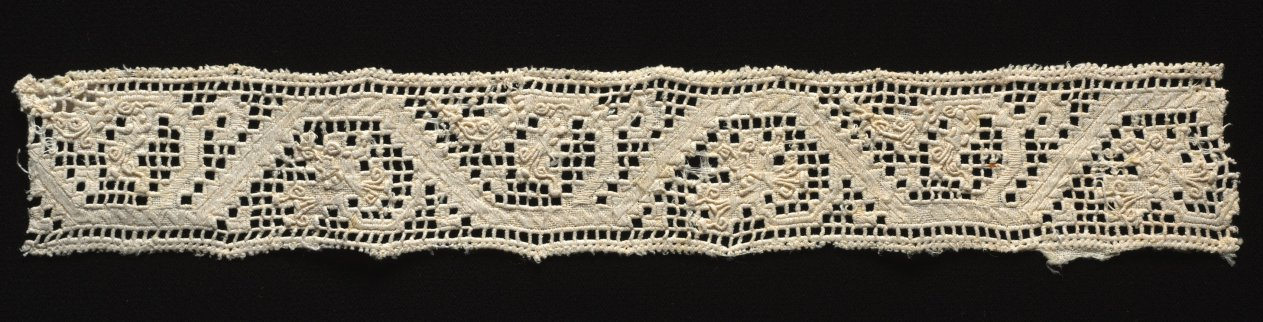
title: Lace fragment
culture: Italy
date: 1500s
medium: Linen: needle lace (drawnwork) insertion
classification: Lace